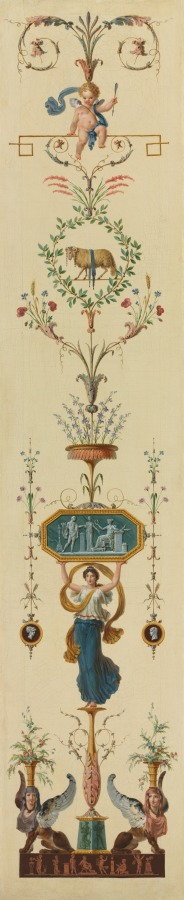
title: Decorative Panel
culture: France, 18th century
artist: Pierre Rousseau (French, 1751–1829)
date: 1790s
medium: oil on canvas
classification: Painting